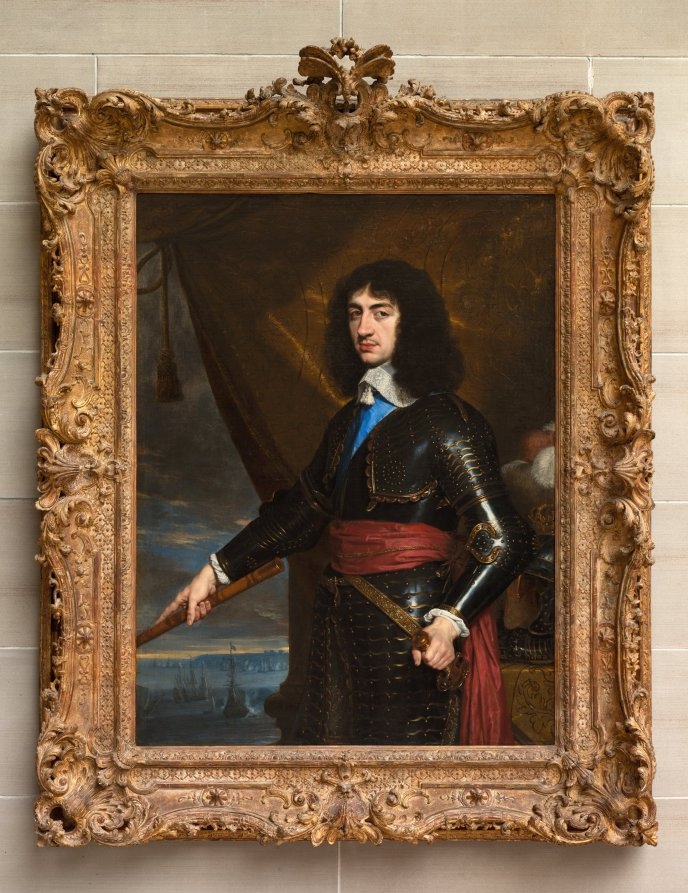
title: Portrait of King Charles II of England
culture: France, 17th century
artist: Philippe de Champaigne (French, 1602–1674)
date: 1653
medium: oil on canvas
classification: Painting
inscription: Inscribed lower center: "A°.1653"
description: Charles II (1630–1685) fled England in 1651 during the English civil war and commissioned this portrait during his exile in France. Charles II never fought on the battlefield, but he was the last British monarch to wear a full suit of armor, which represented his rank and status. The king gestures to the sea beyond the Dover cliffs, and the waiting fleet reveals his intention to return to England, which he did in 1660.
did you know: Charles is wearing a typical French cuirassier's armor. Meant for cavalry, the style indicates it was made around 1630 and was likely a gift as Charles would have been an infant at the time it was created.